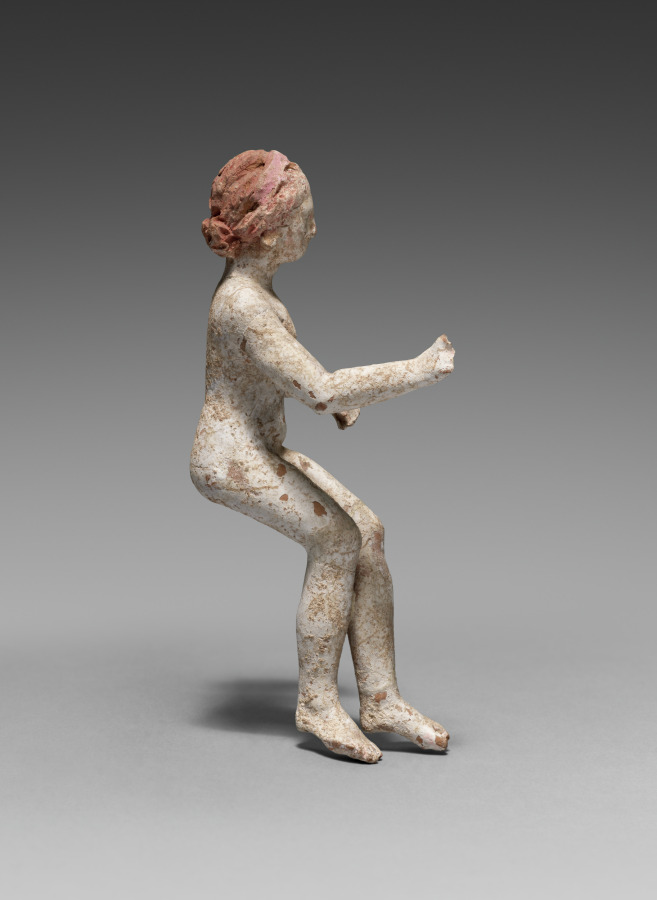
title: Figurine of a Nude Woman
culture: Greece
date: 400–200 BCE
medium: terracotta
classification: Sculpture